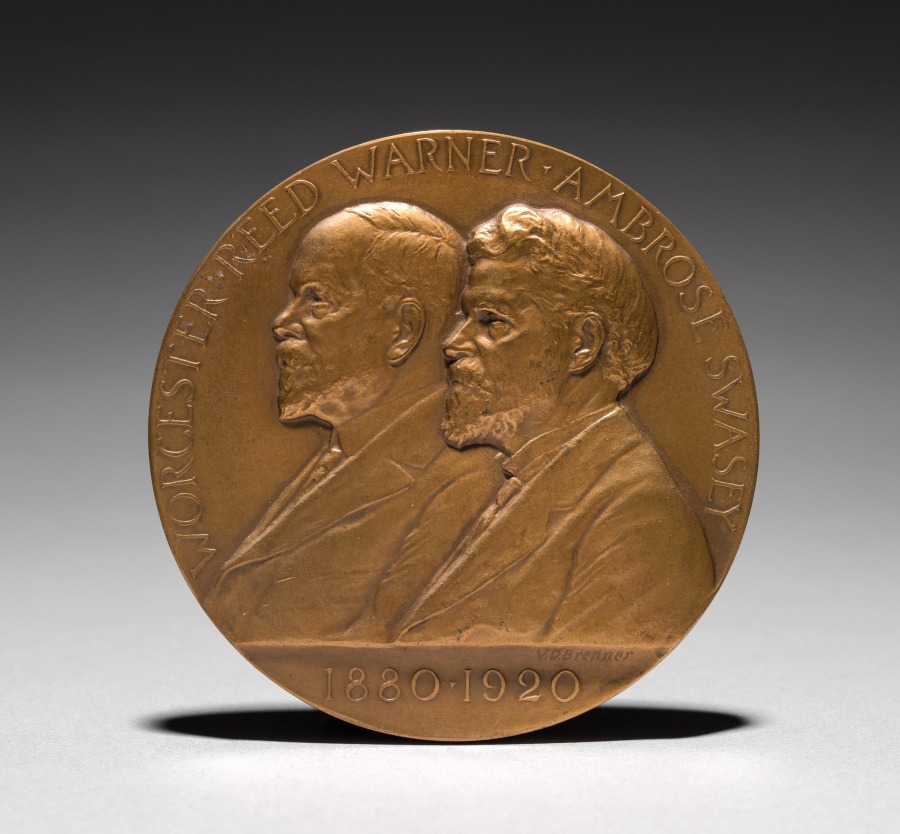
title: Medal Commemorating the 40th Anniversary of the Warner and Swasey Company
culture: America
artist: Victor D. Brenner (American, 1871–1924)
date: 1920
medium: bronze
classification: Metalwork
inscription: "Worcester Reed Warner. Ambrose Swasey, 1880-1920."